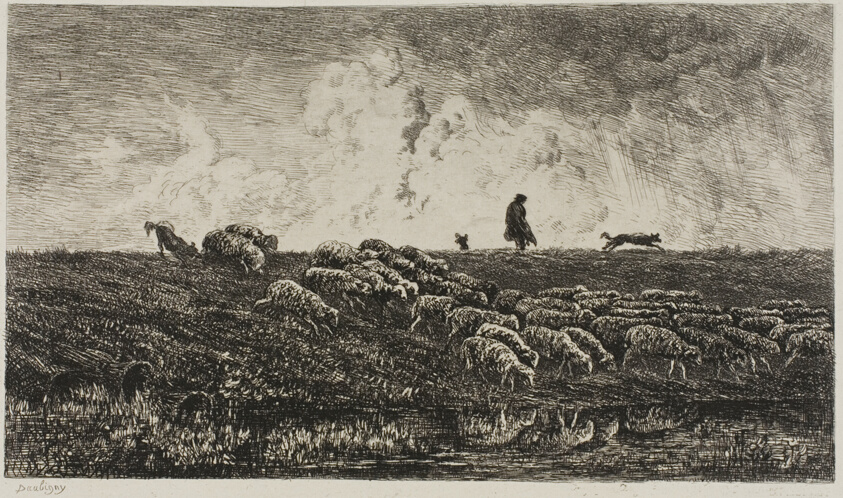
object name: Print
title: The Shower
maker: Charles François Daubigny (French, 1817-1878)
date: c. 1851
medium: Etching on light gray chine laid down on white wove paper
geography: France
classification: etching; print; prints and drawing